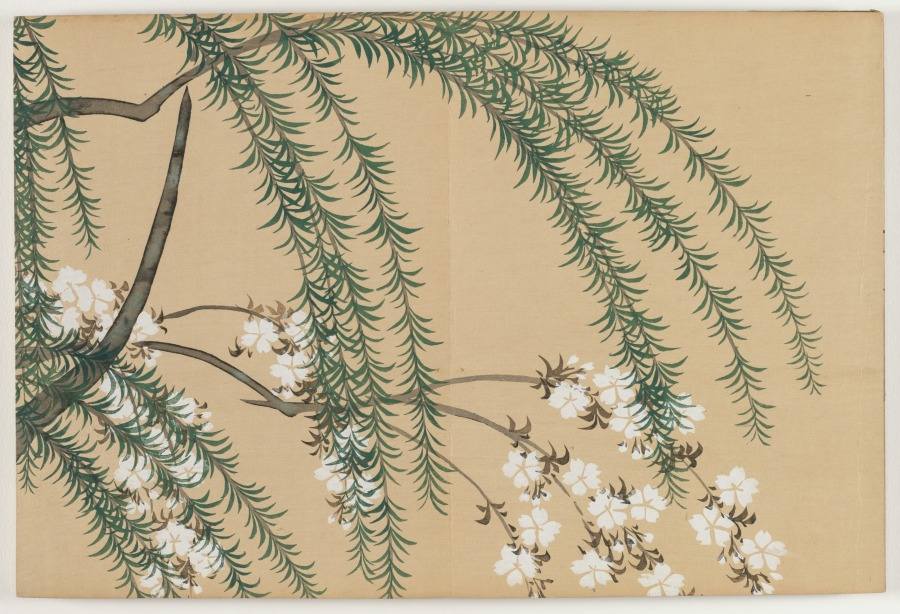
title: Flowers of a Hundred Worlds (Momoyogusa): Willow and Cherry (Yanagizakura)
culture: Japan, Meiji period (1868–1912)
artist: Kamisaka Sekka (Japanese, 1866–1942)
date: 1909–10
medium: color woodcuts with gold and silver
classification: Bound Volume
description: This print from a set of three woodblock printed albums displays the graphic design prowess of Kamisaka Sekka. The images were first distributed one by one to subscribers to the series but later were reissued in bound form, like this book, for mass consumers. Each print features a vignette taken from nature or Japanese literature. Many of the scenes have a long history in Japan, originating in the 900s or 1000s and having been interpreted by all manner of artists since that time. Sekka’s selections hew closely to precedents from the Rinpa style originated by painter Tawaraya Sōtatsu (c. 1570–c. 1640) and calligrapher Hon’ami Kōetsu (1558–1637).